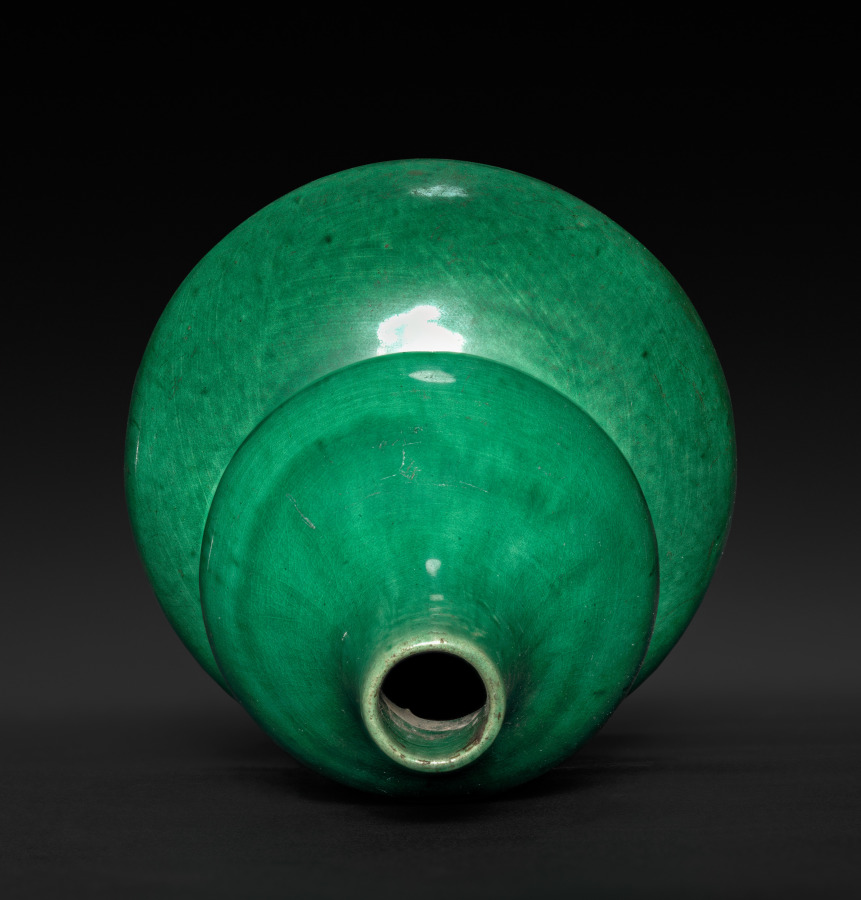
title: Double Gourd-shaped Green Vase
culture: China, Ming dynasty (1368–1644)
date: 1368–1644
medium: stoneware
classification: Ceramic